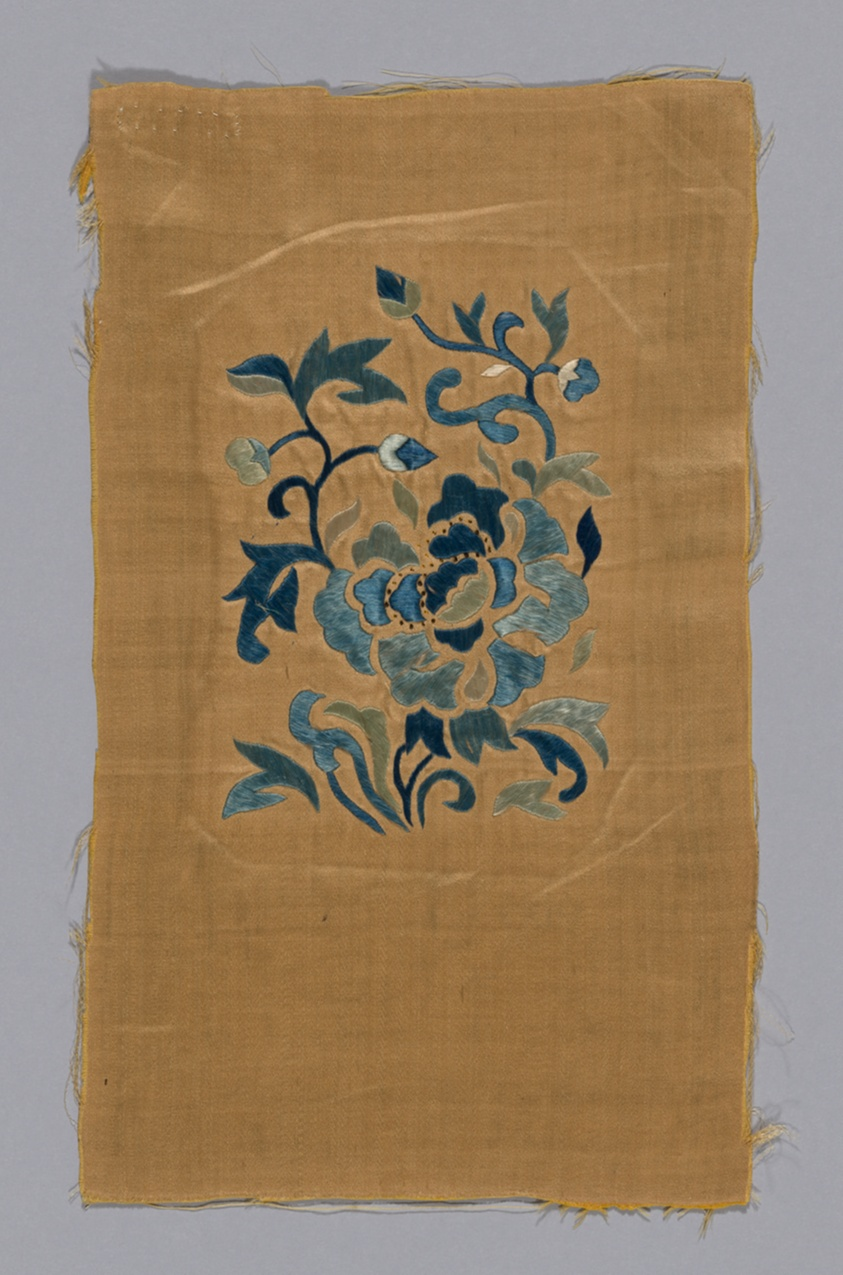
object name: Textile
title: Fragment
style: qing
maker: China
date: 1900, Qing dynasty(1644–1911)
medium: Example of the method used in Chinese embroidery.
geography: China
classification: textile; needlework (visual works)